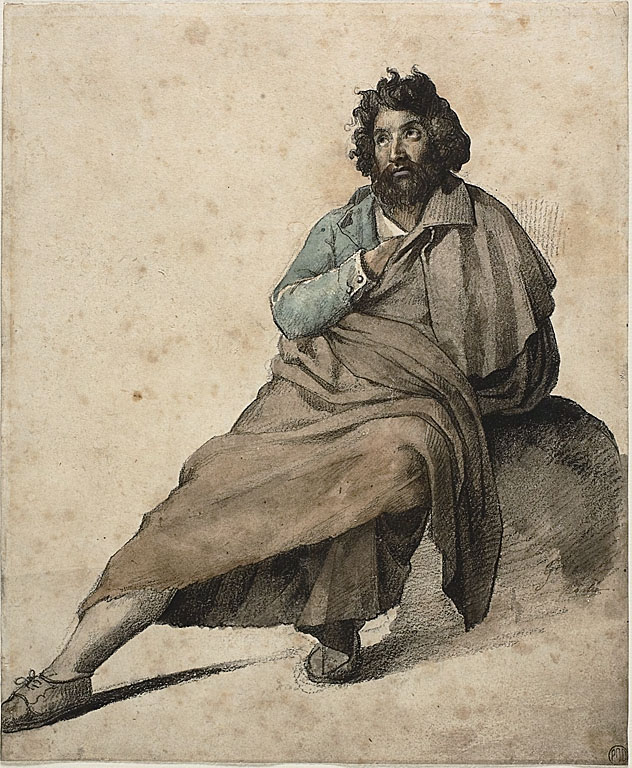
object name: Drawing and Watercolor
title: Seated Italian Peasant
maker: Jean Louis André Théodore Géricault (French, 1791-1824)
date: 1816/1817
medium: Watercolor, with black crayon and traces of pink gouache, over black chalk, on cream wove paper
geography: France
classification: watercolor; drawings (visual works); prints and drawing